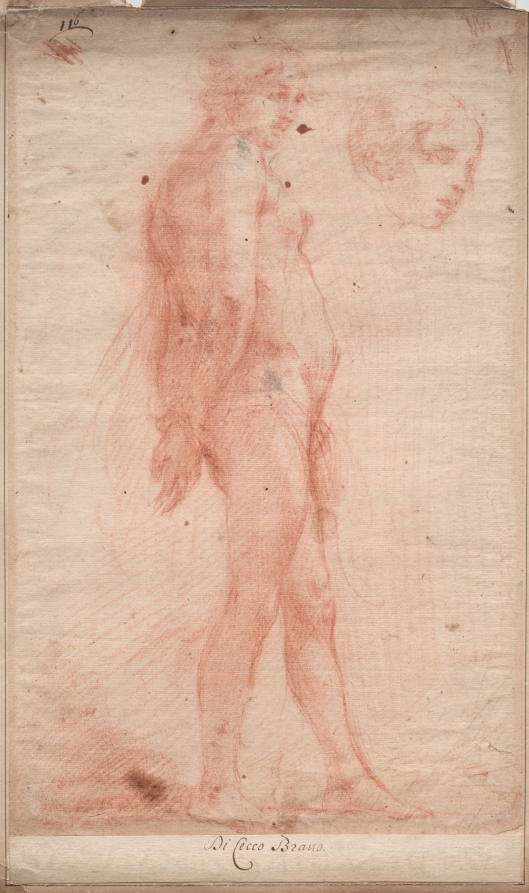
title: Study of a Standing Male Nude, with a Study of Head in Three-Quarter Profile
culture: Italy, 17th century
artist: Cecco Bravo (Italian, 1607–1661)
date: c. 1640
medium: red chalk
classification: Drawing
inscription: upper left, in brown ink: 116 [underlined]; [red chalk scribbles at upper left and upper right] lower center, in brown ink (on paper strip laid down on bottom margin of primary support and on secondary support): Di Cecco Bravo